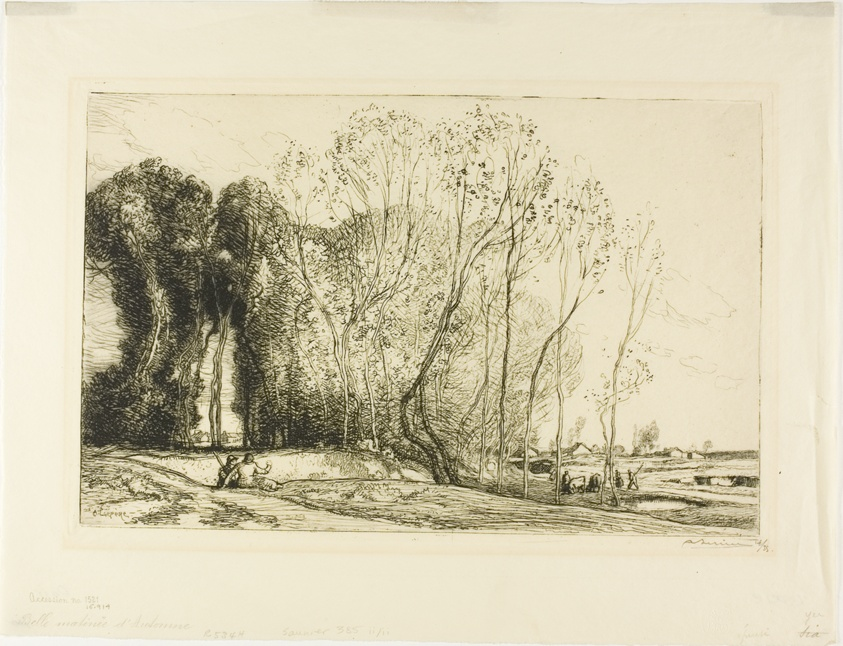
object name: Print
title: Beautiful Autumn Morning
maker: Louis Auguste Lepère (French, 1849-1918)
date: 1910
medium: Etching on cream wove paper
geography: France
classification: etching; print; prints and drawing